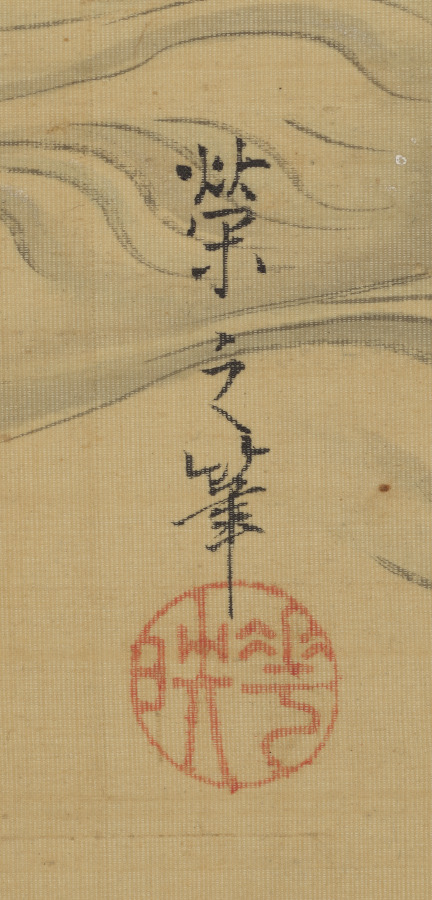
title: Beauty in a Boat on Sumida River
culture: Japan, Edo period (1615–1868)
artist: Chōbunsai Eishi (Japanese, 1756–1829)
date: c. 1801–4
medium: hanging scroll; ink and color on silk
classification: Painting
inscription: artist's signature 栄之筆 and seal, lower right.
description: The Sumida River was a popular refuge from the heat and humidity of the city during the summer. One can see the torii gate of Mimeguri Shrine just to the left of the woman's fan.